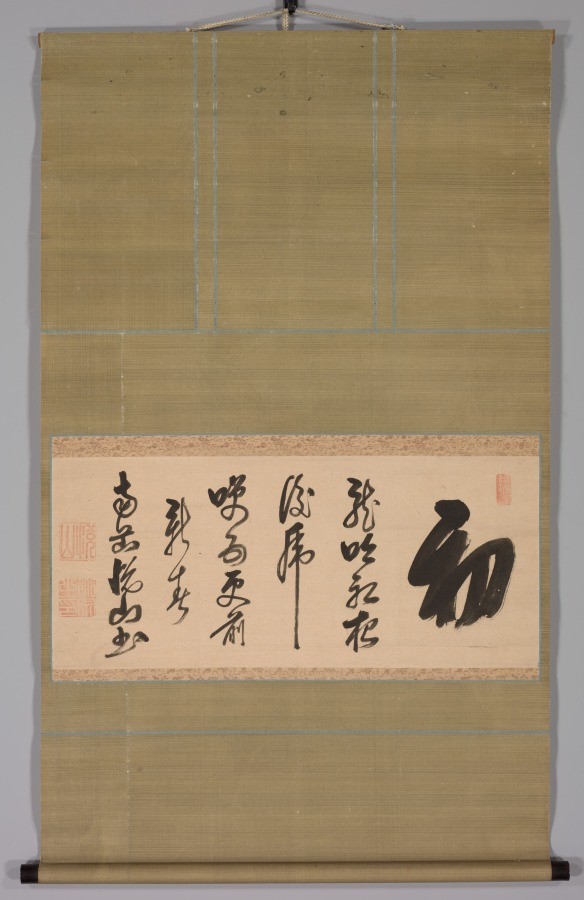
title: Calligraphy in Semi-Cursive Style (xing-caoshu)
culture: China, Qing dynasty (1644–1911)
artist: Yueshan Daozong (Chinese, 1629–1709)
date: c. 1660–1709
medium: Hanging scroll; ink on paper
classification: Calligraphy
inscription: 初/ 龍吟初夜後，虎嘯五更前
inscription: 悅山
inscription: 道宗之印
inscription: Linji zheng zong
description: This spontaneous, bold calligraphy style is characteristic of members of the Japanese Ōbaku school (Huangbo in Chinese) of Chan (Zen in Japanese) Buddhism, which was founded in Japan by Chinese monks in the 1600s. The monk Yueshan emigrated to Japan from the Chinese province of Fujian, taking a priestly post at Manpukuji, the headquarters of the Ōbaku school in Japan. He later became the seventh abbot of the distinguished temple. Yueshan’s calligraphy features rounded characters that allow him to fuse strokes and characters in speedy brush movements. Here the text begins with the large character chu (初, “the beginning”), the initial focus of meditation on the text: The dragon murmurs after sunset. The tiger roars before dawn.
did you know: Ōbaku-style calligraphy favors rounded—rather than angular—brushstrokes. It is not a subtle style of calligraphy, as the Chan monks preferred a bold approach.